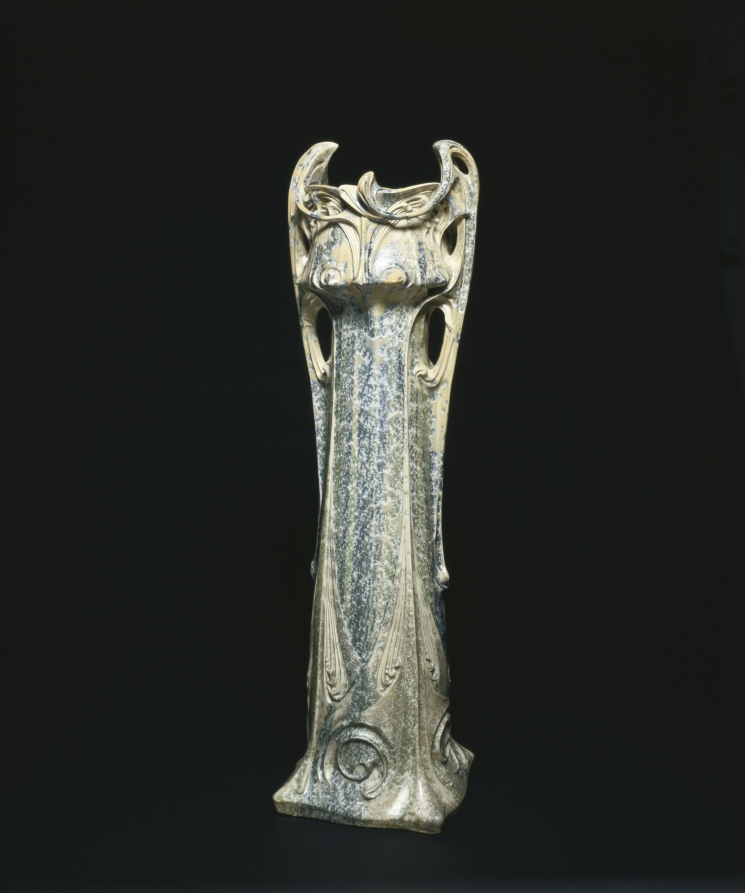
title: Vase des Binelles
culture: France, Sèvres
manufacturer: Sèvres Porcelain Factory (French, est. 1756)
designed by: Hector Guimard (French, 1867–1942)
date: 1903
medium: stoneware with crystalline glaze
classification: Ceramic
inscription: Gres 1903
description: In 1899, French architect Hector Guimard designed the Castle Henriette, built on Rue des Binelles in Sèvres, a suburb of Paris, France. This stoneware vase is named for the street and bears similarities to architectural features of Castle Henriette. The vase’s asymmetrical and curvilinear design showcases the trademarks of the Art Nouveau style. Five examples of the Vase des Binelles were made by the still-operating Sèvres Manufactory, whose ceramics were celebrated for their innovative decoration and design since its establishment in the mid-1700s.